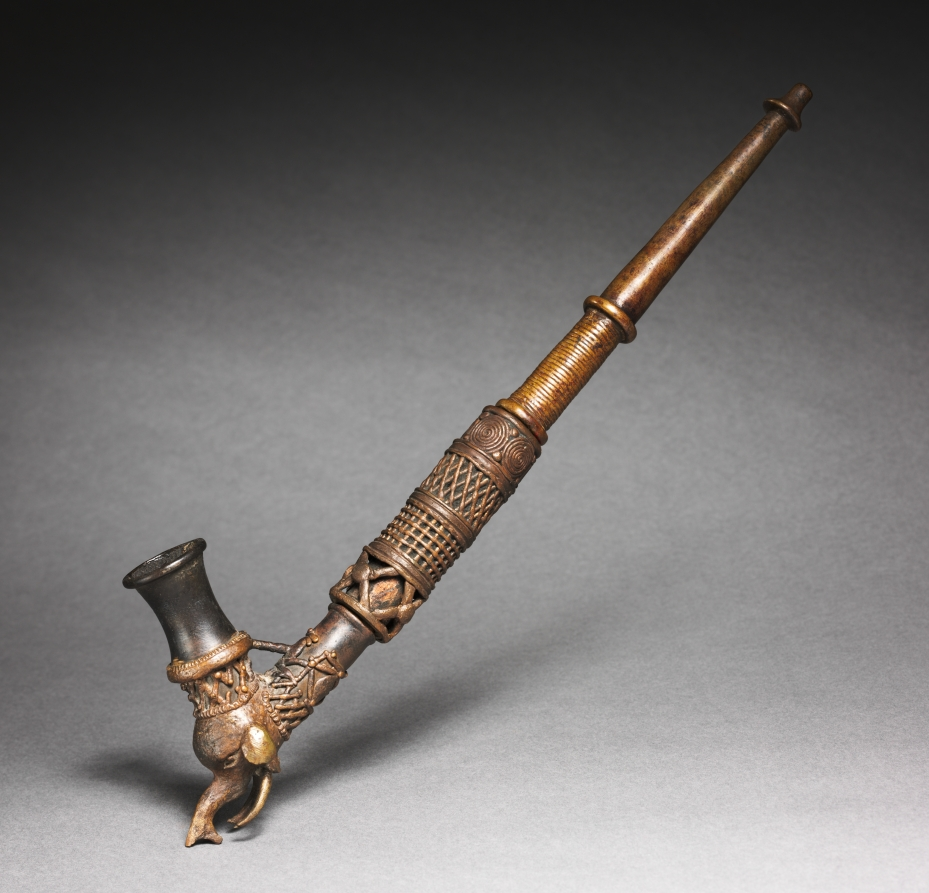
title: Pipe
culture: Equatorial Africa, Cameroon Bagam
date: 1900s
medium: Copper alloy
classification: Implements